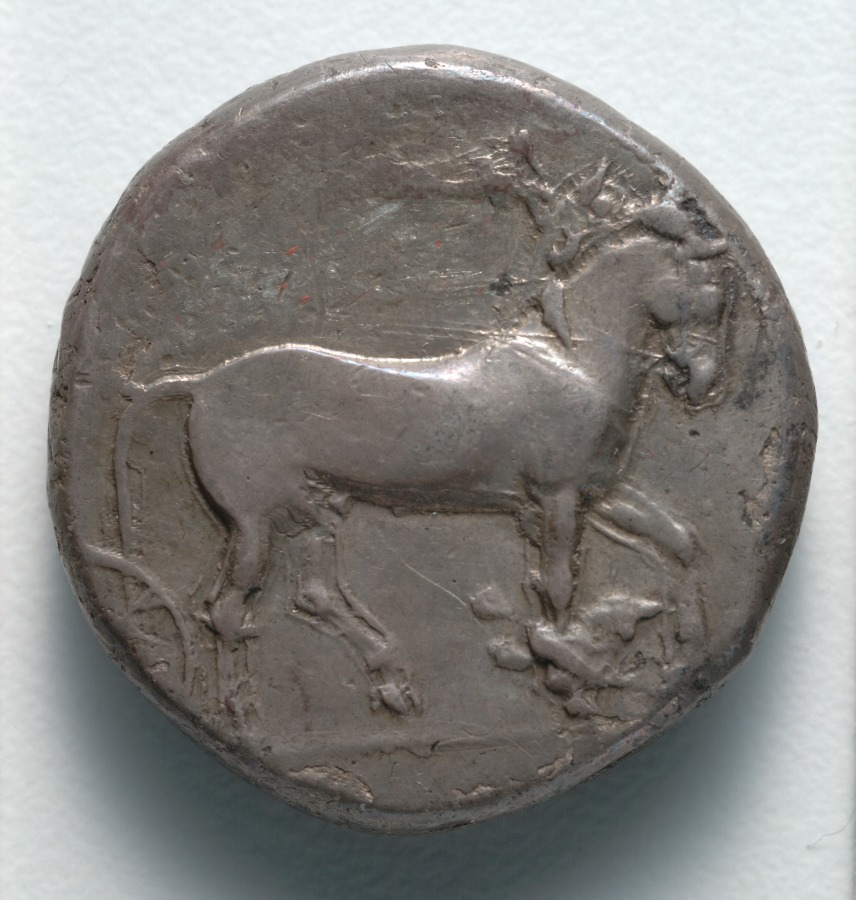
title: Tetradrachm: Quadriga (obverse); Head of Arethousa (reverse)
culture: Greek, minted at Syracuse (Sicily)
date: c. 430–420 BCE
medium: silver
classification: Coins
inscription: ΣΥΡΑΚ[ΟΣΙΟ]Ν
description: The rightmost horse of a chariot team dominates the obverse of this coin, while the other three are suggested only by contours. On the reverse, four dolphins should surround Arethousa, but poor positioning during the striking process has left off one and most of another. The lumps around the horses’ front legs suggest a die defect.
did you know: Arethousa’s banded hairstyle provides remarkable contemporaneous evidence of ancient Greek women’s fashions.